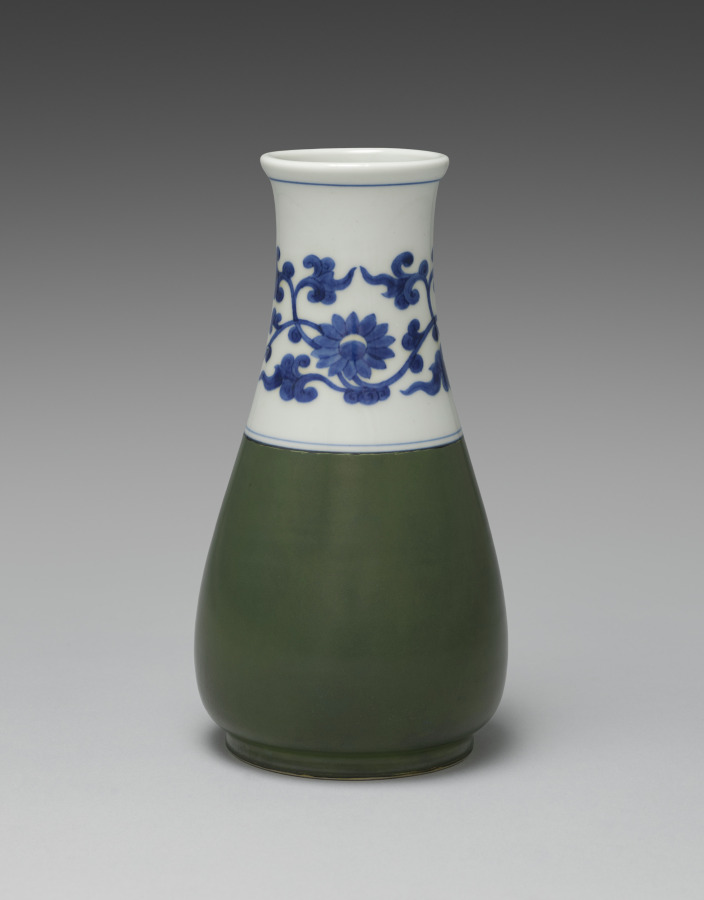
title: Flower Vase with Floral Scroll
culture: Japan, Meiji period (1868–1912)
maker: Seifū Yohei III (Japanese, 1851–1914)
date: 1893–1914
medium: Porcelain with underglaze colors and green glaze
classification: Ceramic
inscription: 清風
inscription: 帝室技芸員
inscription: 金聲玉振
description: The upper part of this vase is painted in underglaze blue with a floral scroll of leaves accentuated with a single chrysanthemum motif on each face and bound at top and bottom with single blue lines. The box lid for the vase is short on detail; the inscription notes only that it is a flower vase with underglaze blue. It is possible that the box is a mismatch because the inscription does not mention the vase’s more distinctive feature: the deep green glaze on its lower half, which is seen much less frequently among Yohei III’s works. This glaze may be an example of a dark green porcelain glaze called rōkanji, which the artist invented in 1892. The name of the glaze comes from Chinese, in which it is pronounced langgan. It may literally mean “tinkling sound of jade” and could refer to malachite, among other proposed identifications.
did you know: The center of each chrysanthemum has a crescent-shaped design at the top filled with a very pale yellow wash under the transparent glaze.